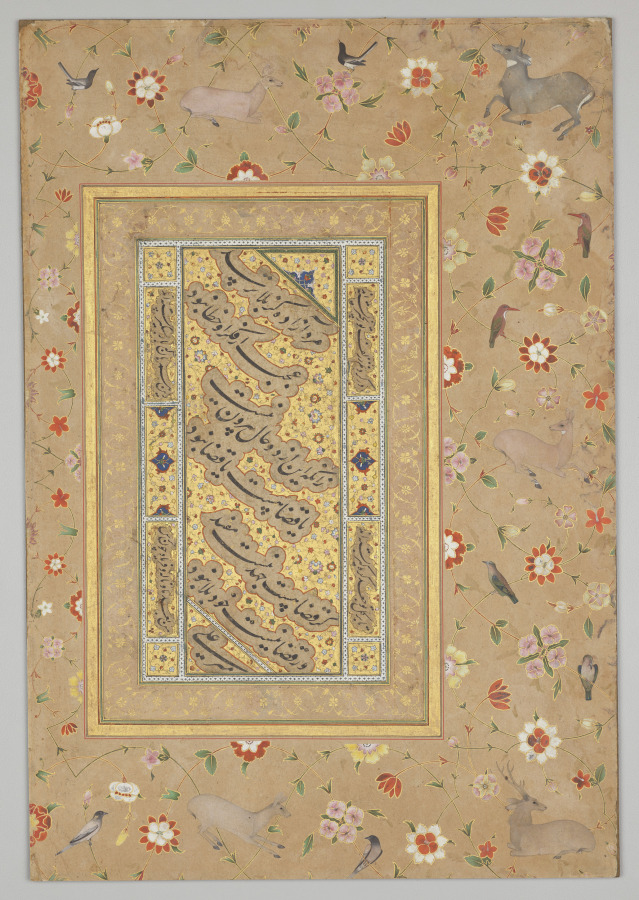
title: Persian calligraphy framed by an ornamental border of flowers, birds, and deer, from the Late Shah Jahan Album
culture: Mughal India, court of Shah Jahan (reigned 1628–58)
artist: Mir 'Ali Haravi (Persian, active in Herat, Afghanistan, died c. 1550)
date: calligraphy: c. 1500–1540; border: c. 1630–40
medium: Gum tempera, gold, and ink on paper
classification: Painting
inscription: Ever since knotted locks of your hair were tied around your throat,/ My neck has also been chained by your tresses./ Henceforth my lot is to lament and cry,/ sounding like the [awakening] caravan bell,/ Protesting against these fellow travelers who have tied a heavy load on a nightingale.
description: About 100 years after the calligraphy was completed by a Persian master and embellished with gold and floral arabesques, the small page was mounted into an album for the Mughal emperor of India. Mughal artists filled the outer border with floral vines, blooming and budding with many varieties. Pairs of birds perch throughout; male and female deer relax, listening to the birdsong. The Indian artists chose to emphasize nature’s abundance and life-giving forces, whereas the Persian artists sought to achieve exquisite, gemlike refinement. The central poem, by Ibn-i Yamin (Persian, 1286–1368), encourages the reader not to worry about unexpected calamities.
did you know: On the right, two white-throated kingfishers, a species native to Asia, sit on thin vines.